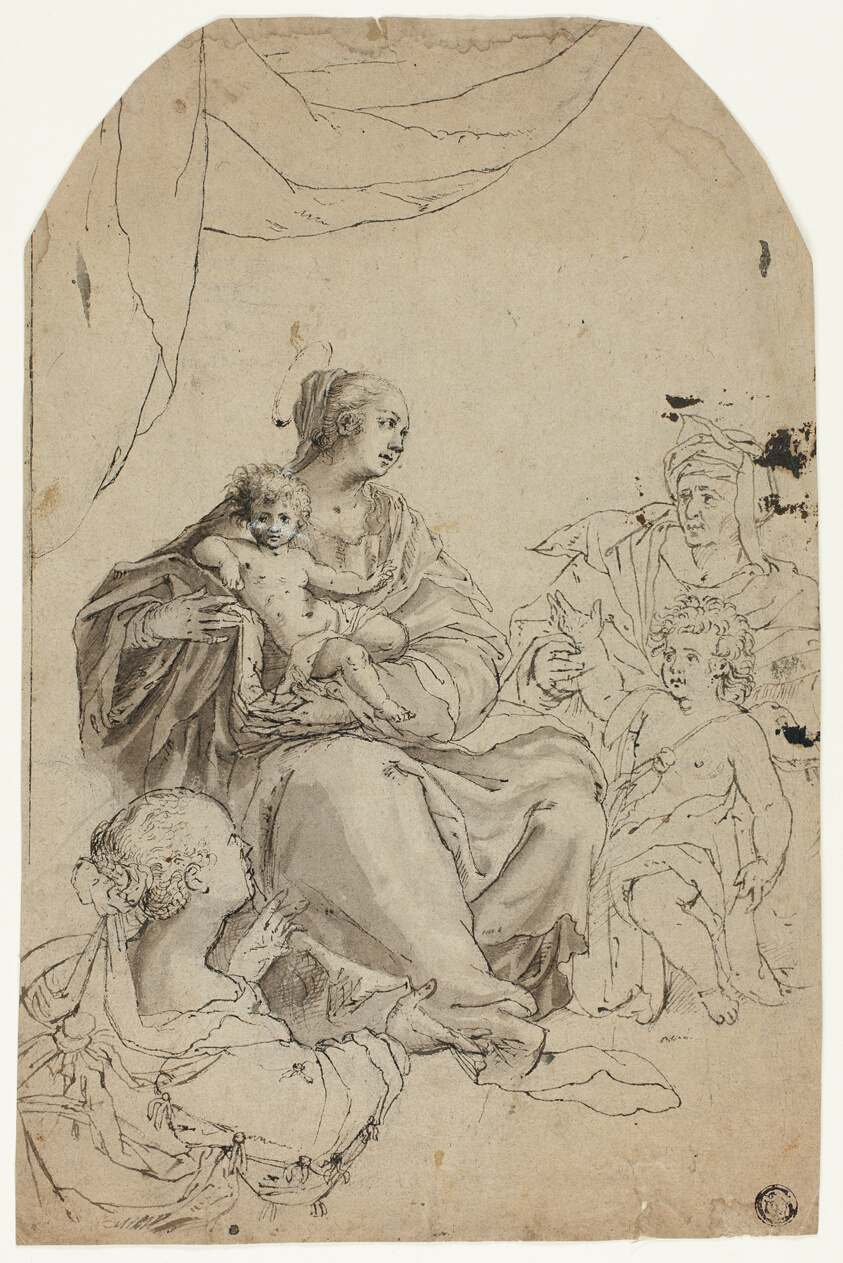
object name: Drawing and Watercolor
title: Madonna and Child with Saints Elizabeth, John and Anne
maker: After Raphael Sadeler (Flemish, 1560/61-1628/32); after Hans von Aachen (German, 1552-1616)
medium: Pen and brownish-black ink, with brush and brown wash, heightened with touches of white gouache, on lunette-shaped tan laid paper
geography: Germany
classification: pen and ink drawings; drawings (visual works); prints and drawing